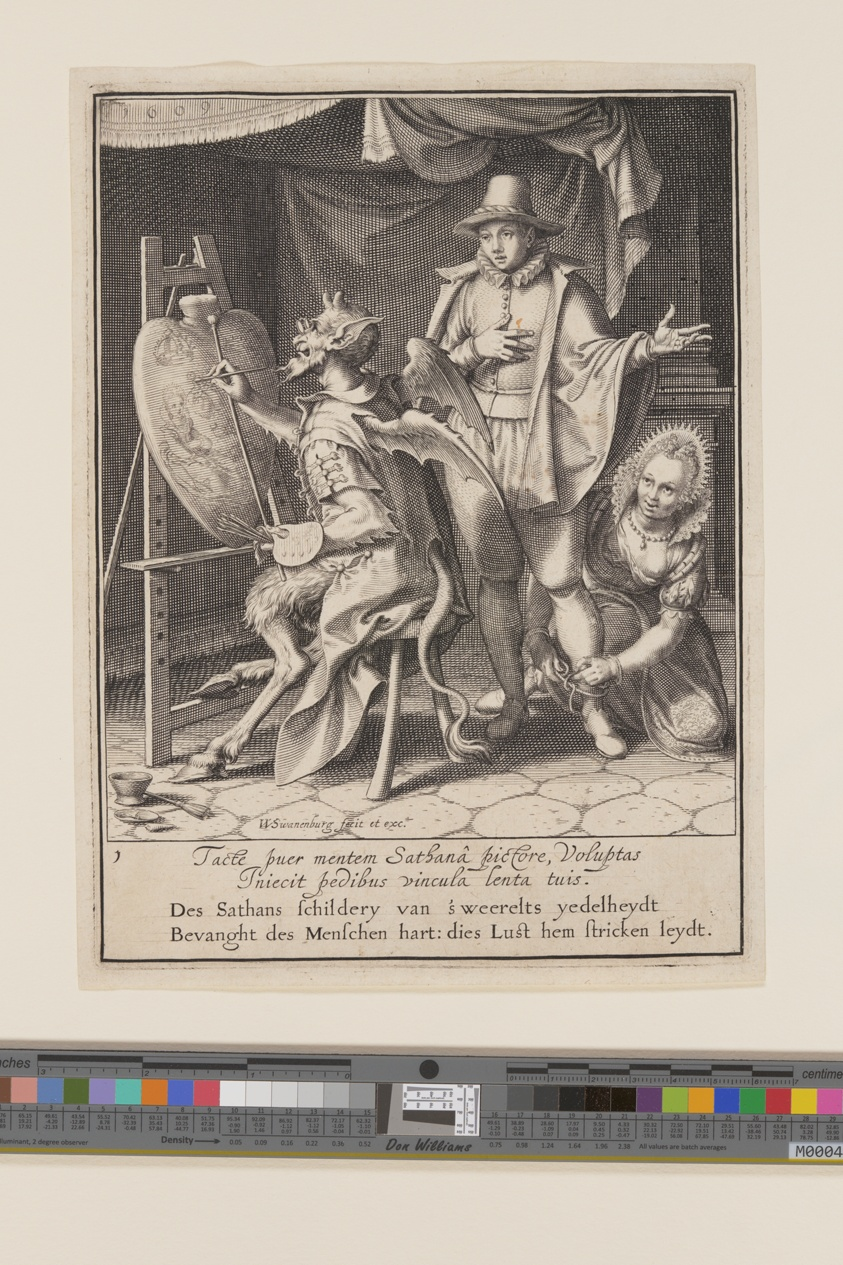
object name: Print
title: The Devil Painting Man’s Heart, from Allegory of the Misuse of Worldly Property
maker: Willem van Swanenburgh (Dutch, 1580–1612); after Maerten van Heemskerck (Dutch, 1498–1574)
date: 1609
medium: Engraving on ivory laid paper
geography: Netherlands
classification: engraving; paper; print; prints and drawing